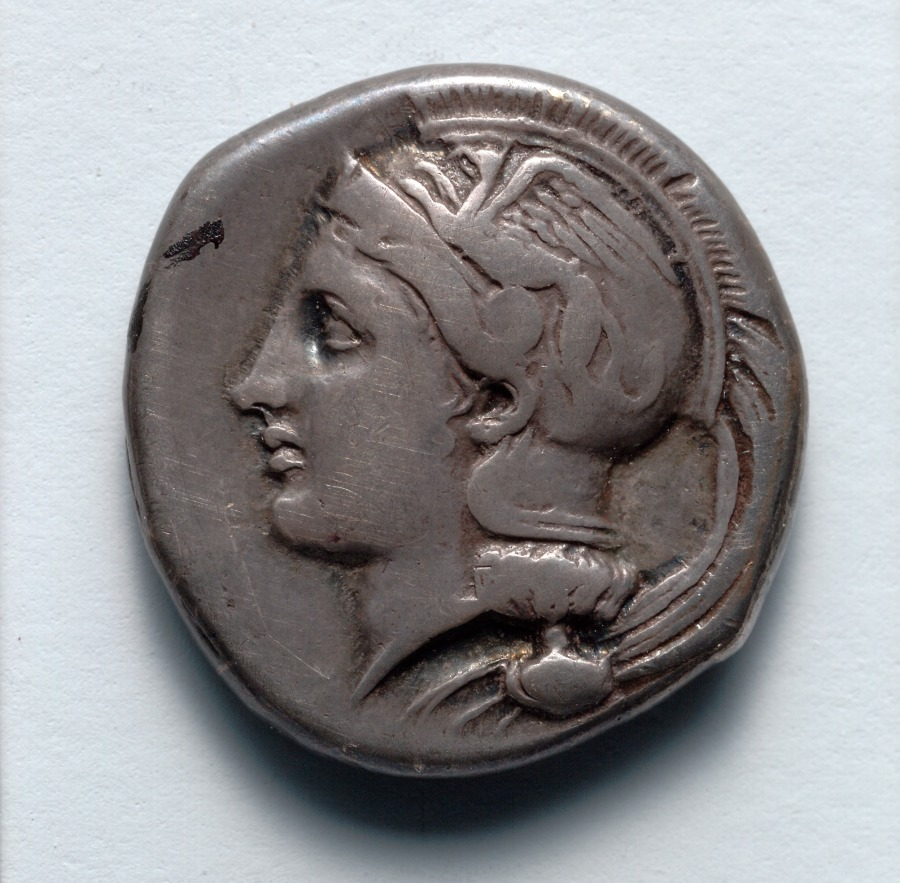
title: Stater: Head of Athena (obverse); Lion (reverse)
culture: Greek, minted at Hyele (South Italy)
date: c. 340–334 BC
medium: silver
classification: Coins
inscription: ΥΕΛΗΤ[ΟΝ]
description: The lion, king of the beasts and an animal associated with regal and heroic power, featured prominently on the coinage of many ancient Greek city-states. Artists placed the lion in a variety of poses, sometimes including the whole body, at other times the foreparts or just the head. Although it may once have roamed nearby, for many Greeks the lion was a monster nearly as exotic as the Chimaera, of which it formed a part, together with a goat head and snake-headed tail.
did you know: Nearly worn away above the lion are the remains of a flying owl.